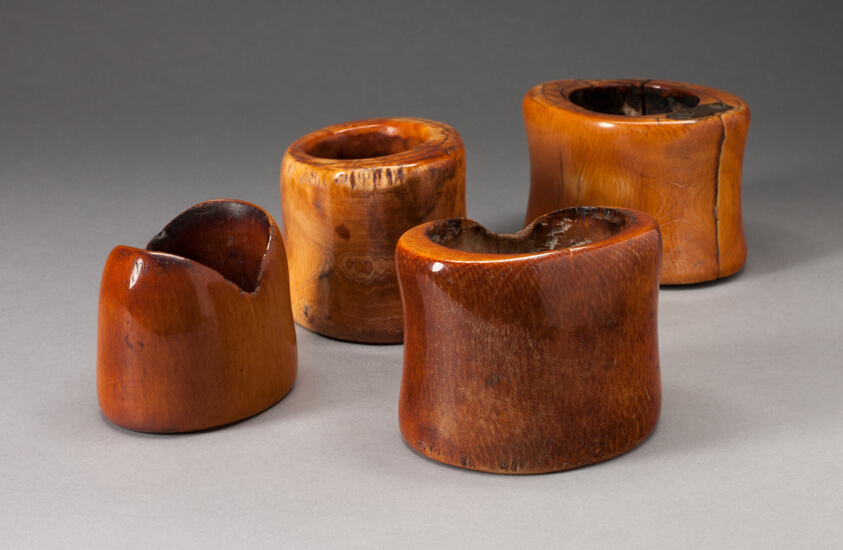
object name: Costume and Accessories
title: Four Bracelets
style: igbo, Arts of Africa, african Art, Coastal West Africa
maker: Igbo; Nigeria; Coastal West Africa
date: Probably 19th century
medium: Ivory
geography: Nigeria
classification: bracelet (jewelry); ivory; jewelry; arts of Africa; african art; costume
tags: costume